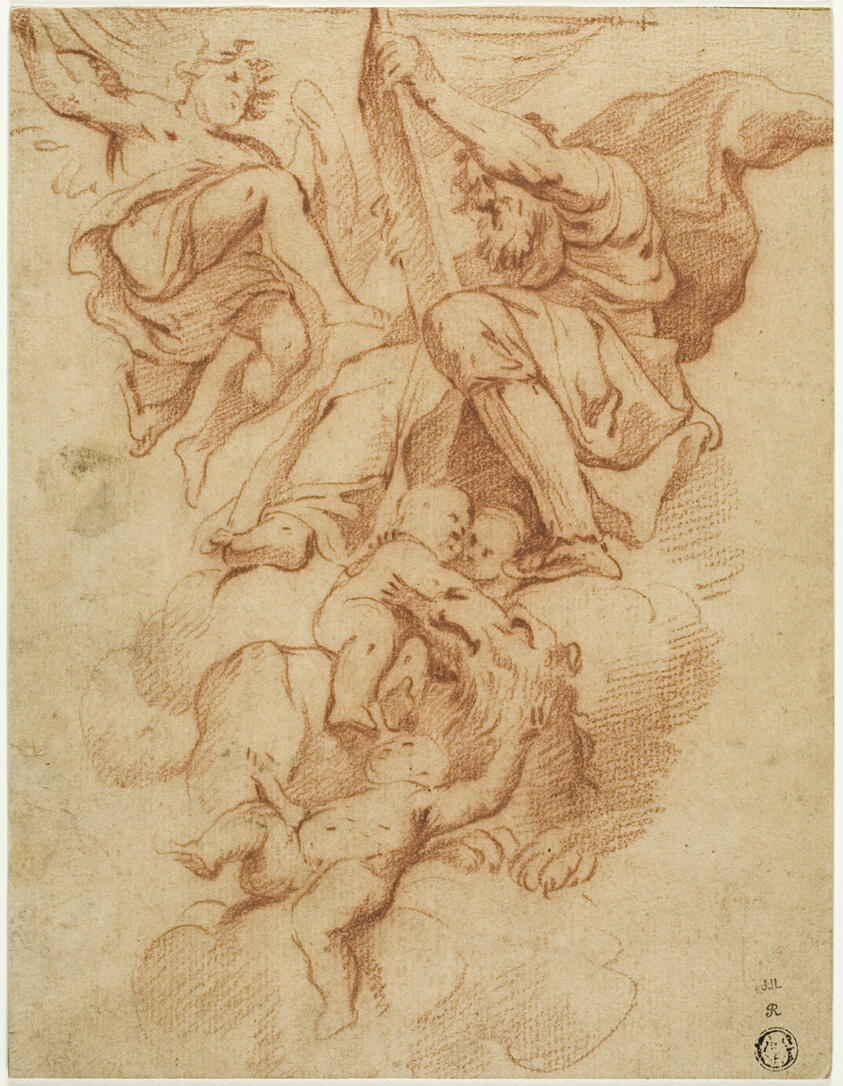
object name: Drawing and Watercolor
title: Saint Mark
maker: Domenichino, after; Italian, 1581-1641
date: after 1627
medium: Red chalk on tan laid paper, laid dwon on cream laid board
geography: Italy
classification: chalk; drawings (visual works); prints and drawing